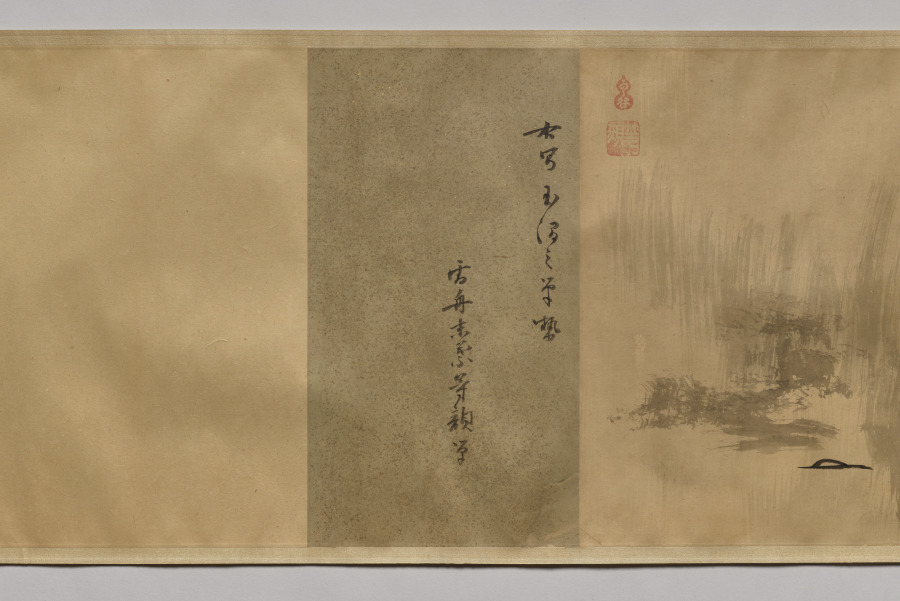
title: Poems and Pictures of the Eight Views of Xiao-Xiang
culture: Japan, Momoyama period (1573–1615)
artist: Unkoku Tōgan (Japanese, 1547–1618)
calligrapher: Inkei Gentetsu (Japanese, 1562–1612)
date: 1605–12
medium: Handscroll; ink on paper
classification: Painting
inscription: Each painting sealed with red gourd-shaped seal reading Unkoku (雲谷) and a square seal reading Tōgan (等顔).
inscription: Each painting prefaced with a titled poem on the Eight Views of Xiao-Xiang by Yujian Ruofen (active late 13th century) inscribed by Japanese Buddhist monk Inkei Gentetsu (1562–1612).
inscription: 右寫玉㵎之筆勢／雪舟末葉等顔筆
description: Unkoku Tōgan brushed these scenes using the splashed-ink technique associated in Japan with the Chinese monk Yujian Ruofen (active late 1200s). Xiao-Xiang refers to the region in present-day Hunan province, where the Xiang River and its tributaries converge. Each of the eight views evokes a time of day or season. The earliest surviving series of Xiao-Xiang paintings is by Wang Hong (active mid-1100s), but textual evidence tells us the theme appears earlier. It was later adopted in Japan and Korea, as seen here. The poems were inscribed by Inkei Gentetsu, the third abbot of the Rinzai Zen temple Tōshunji, Japan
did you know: The “Tō” of Tōgan comes from the name of painter Sesshū Tōyō (1420–1506).